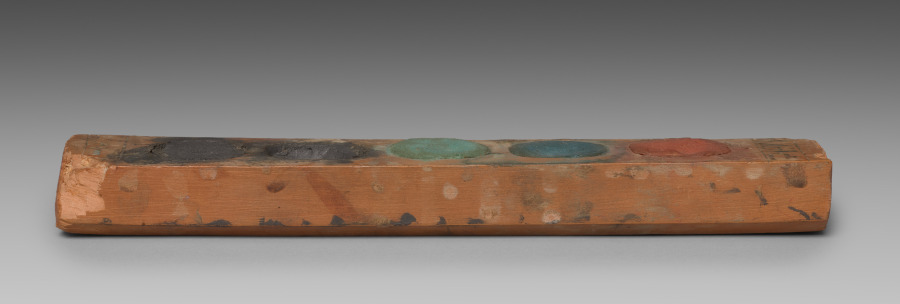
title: Paint Box of Vizier Amenemope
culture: Egypt, New Kingdom (1540–1069 BCE), Dynasty 18, reign of Amenhotep II (1425–1400 BCE)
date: c. 1427–1401 BCE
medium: boxwood with inscription inlaid in Egyptian blue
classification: Implements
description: This paint box still preserves its original cakes of pigment: one cake each of red (red ochre), blue (Egyptian blue), green (a mixture of Egyptian blue, yellow ochre, and orpiment) and two of black (carbon black, from charcoal). It belonged to Amenemope, who was vizier, or prime minister, under Amenhotep II. Amenemope probably used his paint box for recreation.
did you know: Painting was a popular and time-honored pastime among the upper classes in Egypt.